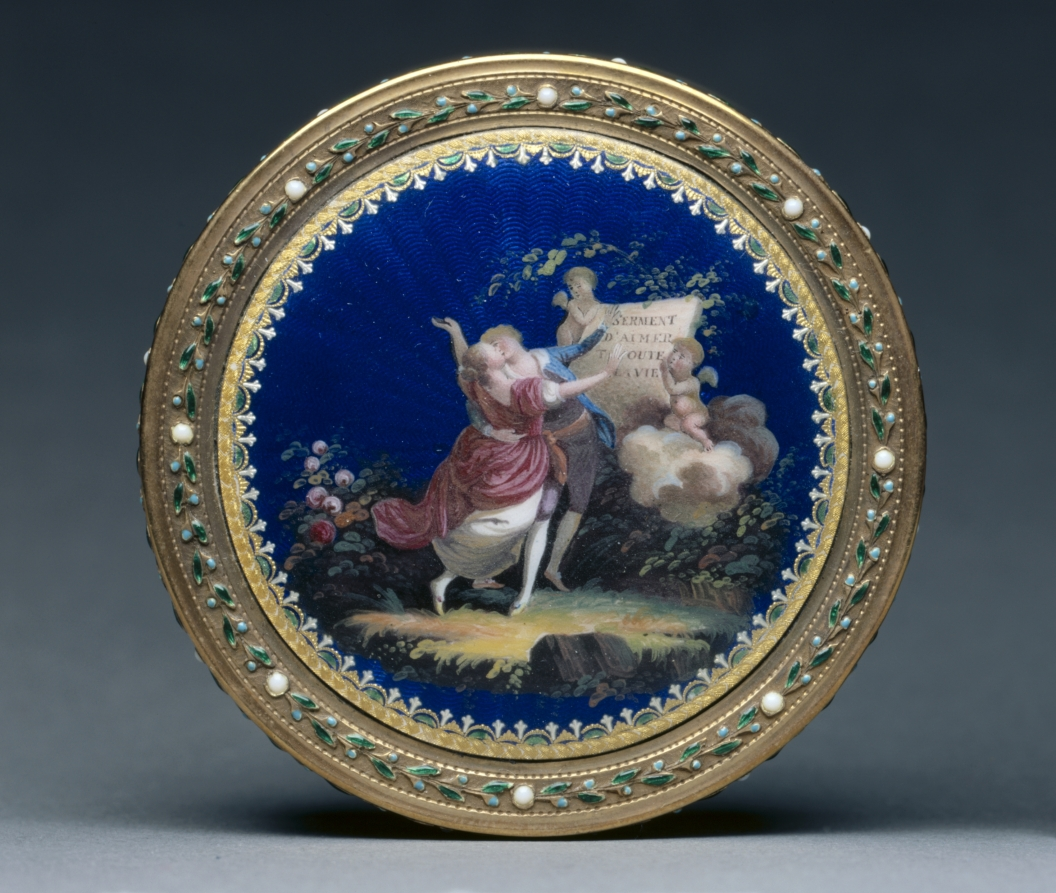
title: Box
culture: France, 18th century (style of Louis XVI)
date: 1700s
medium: gold and enamel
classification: Enamel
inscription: cupids holding book inscribed: Serment d'amour t-outs la vie.